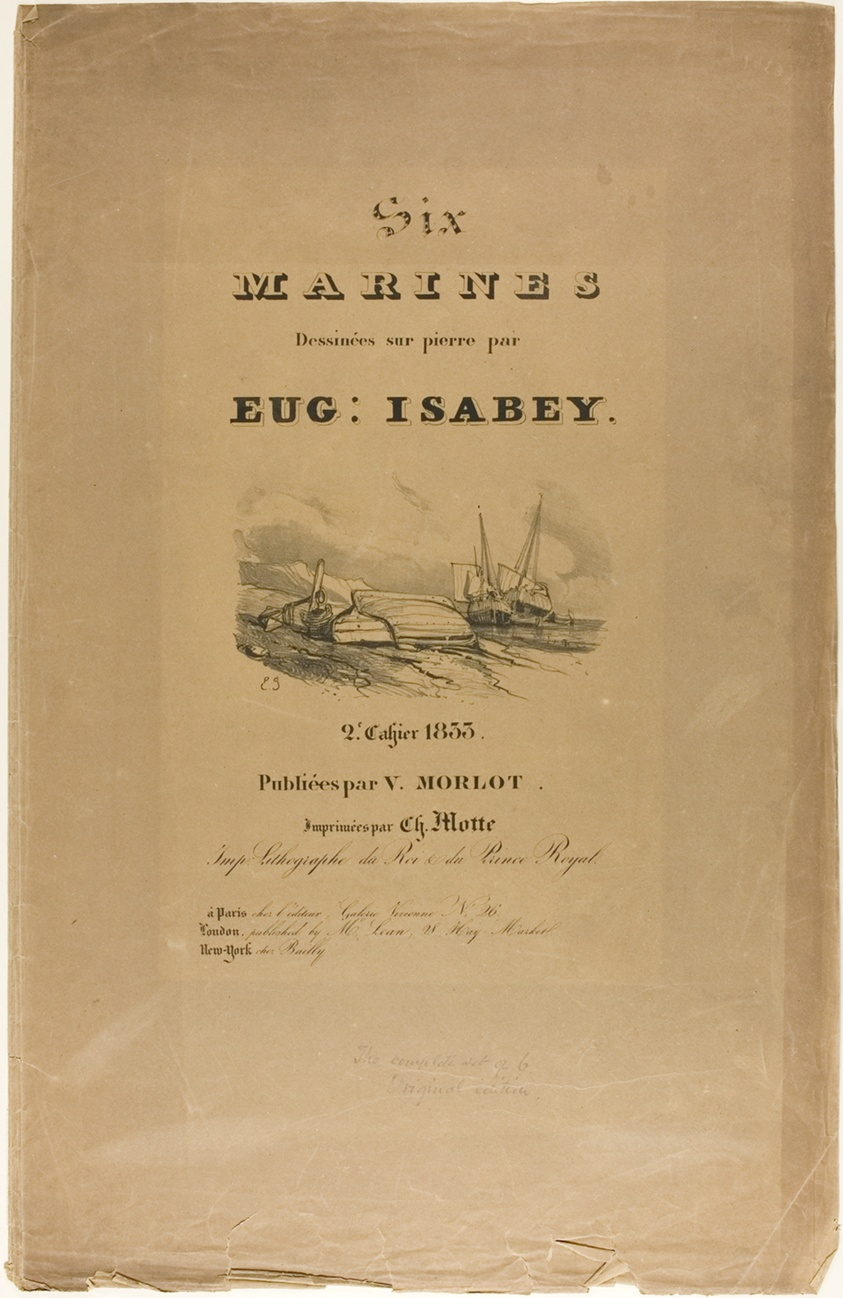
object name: Print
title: Portfolio Cover, for Six Marines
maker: Eugène Isabey (French, 1803-1886); printed by Charles Étienne Pierre Motte (French, 1785-1836)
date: 1833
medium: Bi-fold portfolio cover with lithograph image and text on brown wove paper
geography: France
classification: lithograph; print; prints and drawing